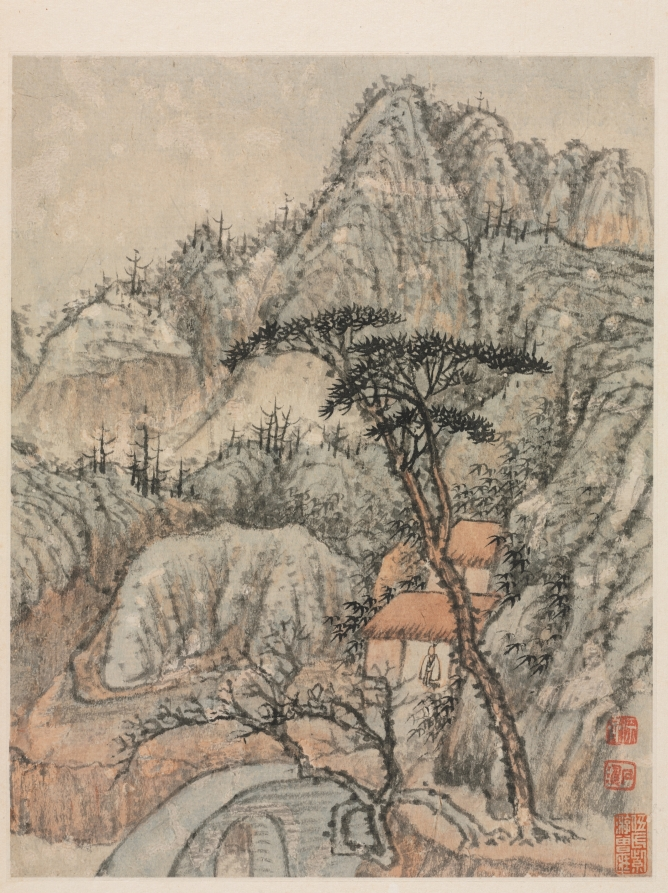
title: Reminiscences of Qinhuai River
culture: China, Qing dynasty (1644-1911)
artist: Shitao (Chinese, 1642–1707)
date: 1642–1707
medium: album leaf, ink and color on Song paper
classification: Painting